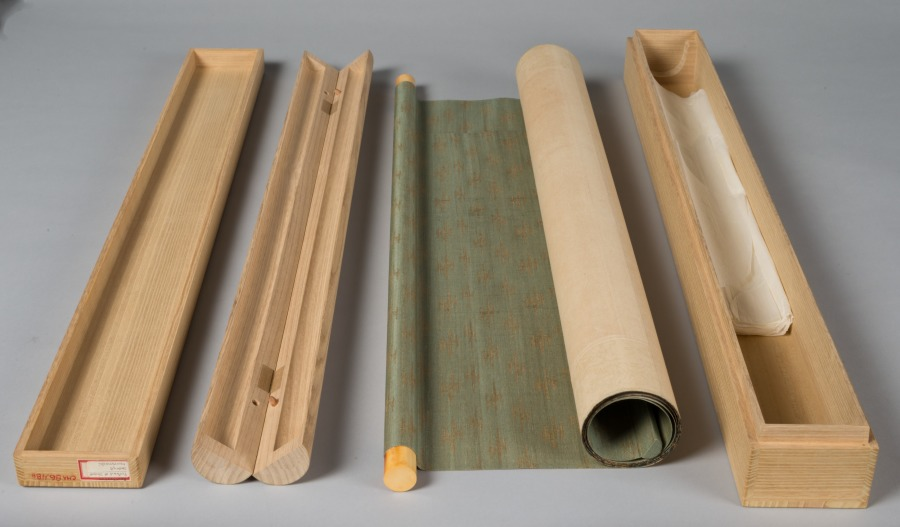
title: Shennong (Shinnō)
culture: Japan, Muromachi period (1392–1573)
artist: Shōryō (Japanese)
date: late 1400s–early 1500s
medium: hanging scroll; ink on paper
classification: Painting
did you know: Shennong legendarily taught people how to farm and also how to use plants as medicine.